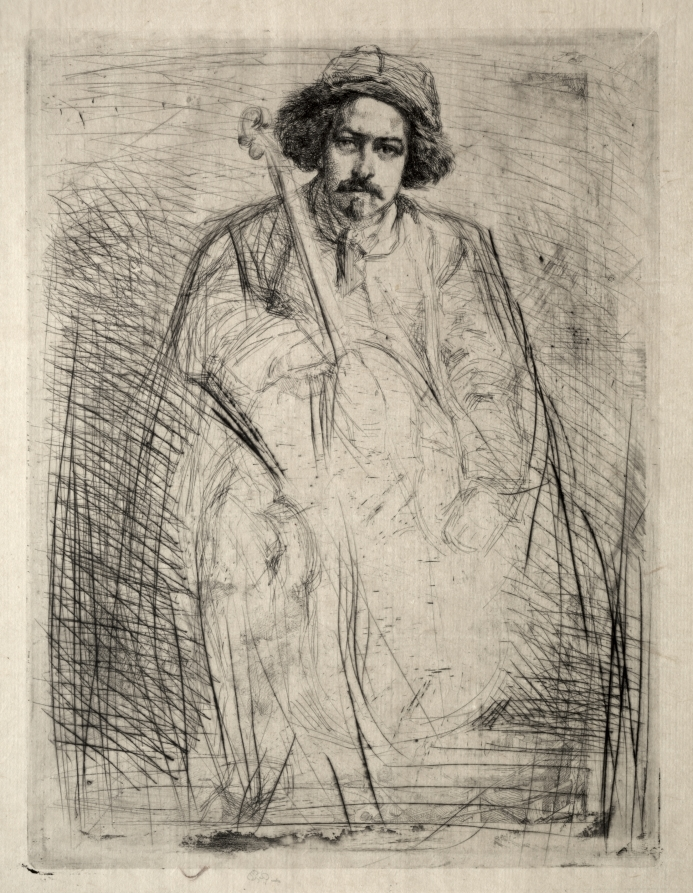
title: Becquet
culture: America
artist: James McNeill Whistler (American, 1834–1903)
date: 1871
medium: etching and drypoint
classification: Print